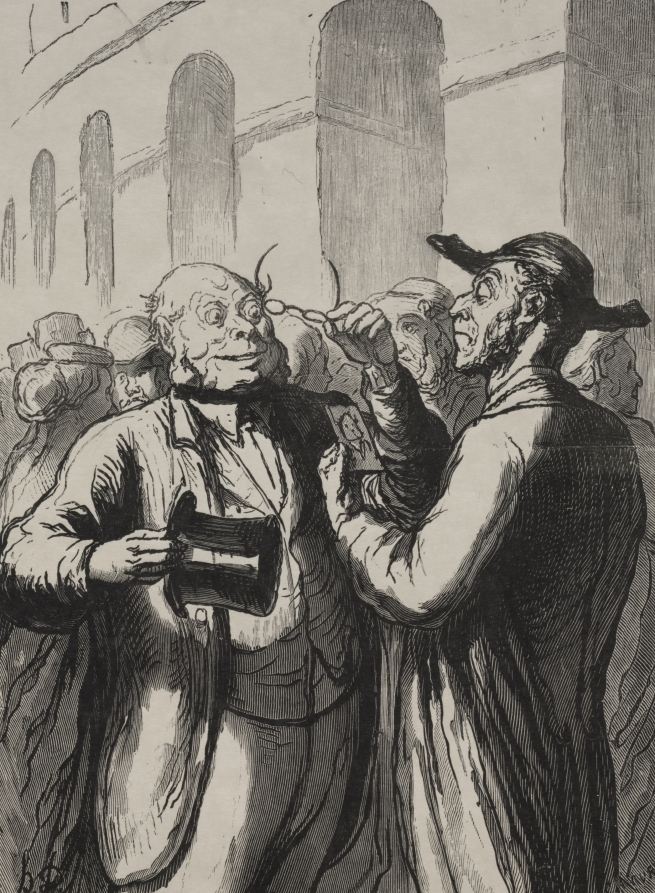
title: At the Universal Exhibition: Security check at the entrance: the bald need to lift their hats, and the short-sighted need to remove their glasses.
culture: France, 19th century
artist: Honoré Daumier (French, 1808–1879)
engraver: Charles Maurand (French, 1824–1904)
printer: François Louis Schmied (Swiss, 1873–1941)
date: 1867, printed 1920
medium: wood engraving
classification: Print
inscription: Lower margin, in pencil: 65/75 ; red stamp: FLS